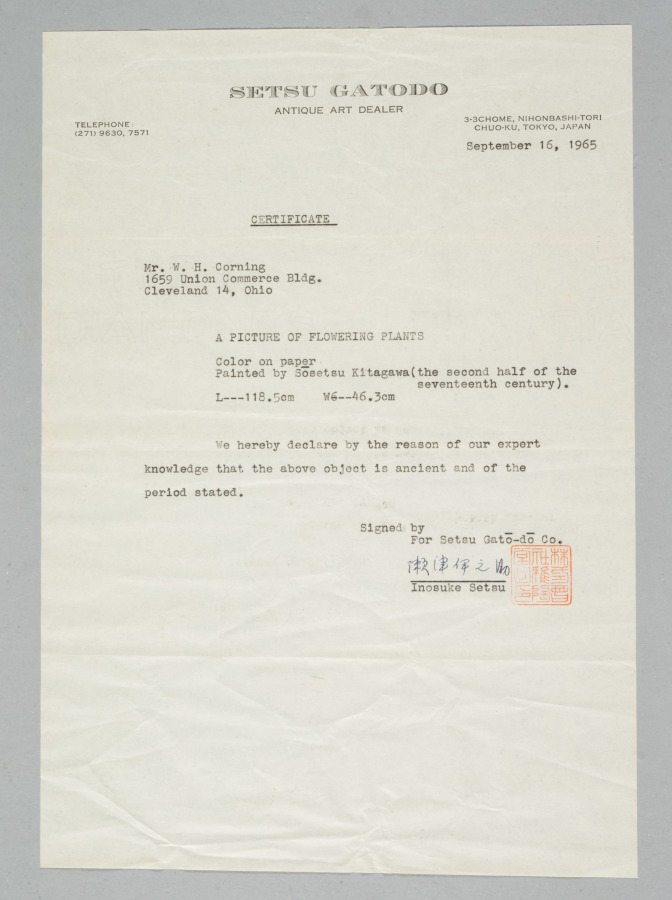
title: Summer Flowers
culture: Japan, Edo period (1615–1868)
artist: Kitagawa Sōsetsu (Japanese, active 1639–50)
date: mid-1600s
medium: hanging scroll; ink, color, and gold on paper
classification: Painting